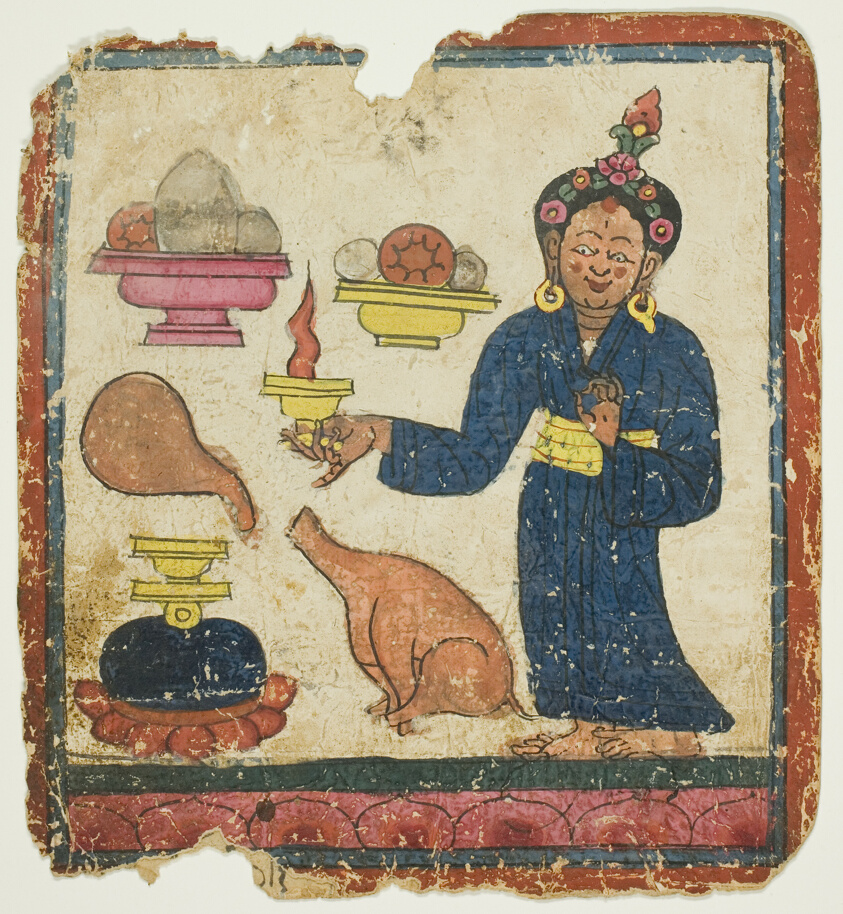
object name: Religious/Ritual Object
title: Image from a Set of Initiation Cards (Tsakali)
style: Himalayan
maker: Southern Tibet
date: 14th/15th century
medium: Ink and watercolor on paper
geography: Tibet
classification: ink; ritual objects